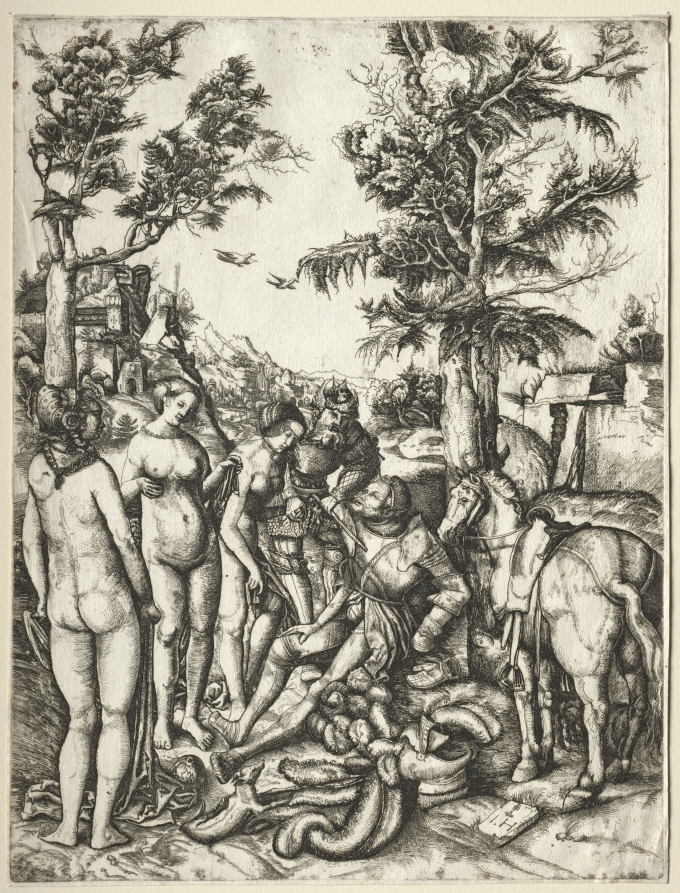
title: Judgment of Paris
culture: Germany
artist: Hieronymus Hopfer (German)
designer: after Lucas Cranach (German, 1472–1553)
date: 1528–63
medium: etching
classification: Print